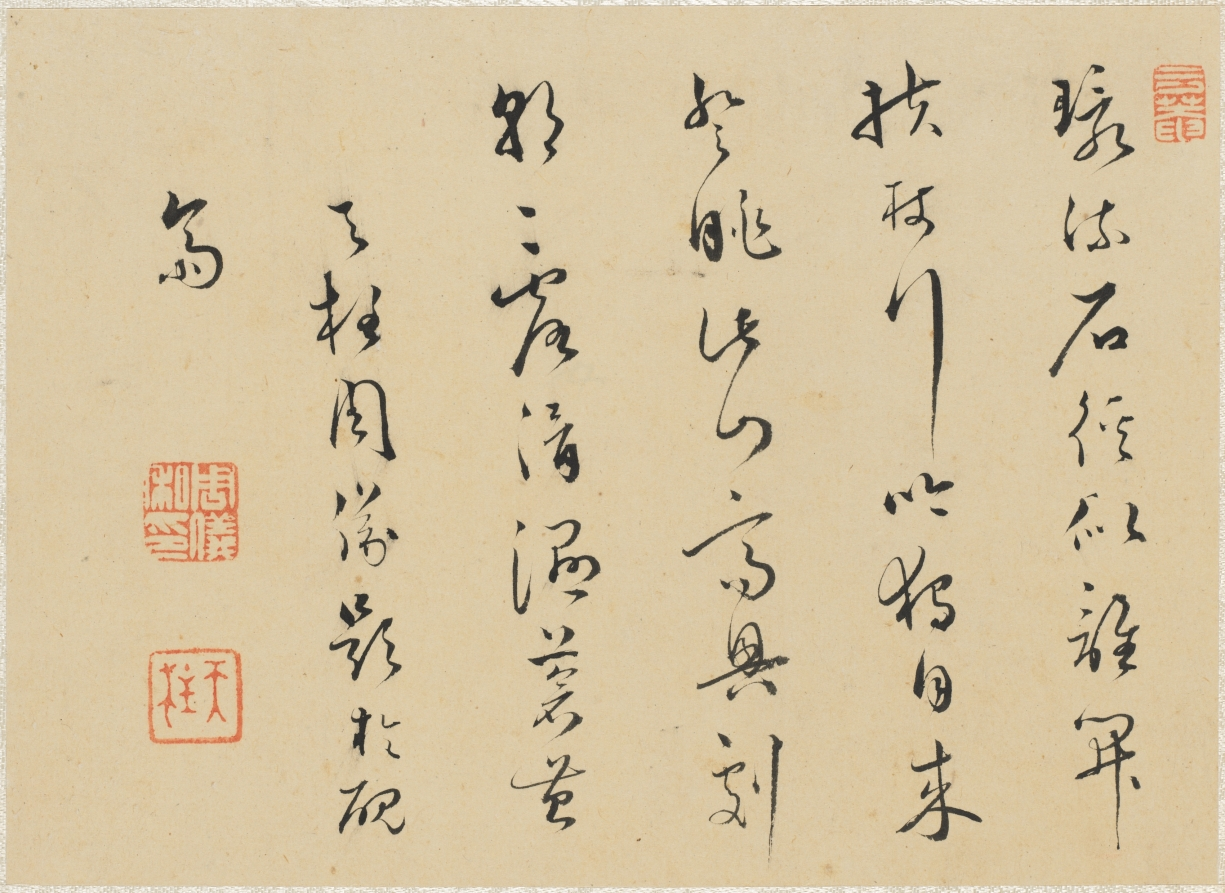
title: Album of Miscellaneous Subjects, Leaf 5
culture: China, Qing dynasty (1644-1911)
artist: Fan Qi (Chinese, 1616–after 1694)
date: early 1650s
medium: album leaf, ink and color on silk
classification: Painting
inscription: Artist seal: Fan Qi 樊圻. Poem by Zhou Yi 周儀 (mid 17th century–about 1705): That stone path surrounded by streams - for whom was it created?/ Leaning on my staff, I walk and hum, arriving alone./ As soon as I ascend to gaze at these mountains, my happiness increases,/ Every morning the moistening dew makes slippery the green moss.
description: Fan Qi's painting on the fifth leaf evokes Zuo Si's poetic line: I shake my robe atop the cliff of thousand ren. The calligraphy by Zhou Yi adjacent to the painting reads: That stone path surrounded by streams—for whom was it created? Leaning on my staff, I walk and hum, arriving alone. As soon as I ascend to gaze at these mountains, my happiness increases, Every morning the moistening dew makes the green moss slippery.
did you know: Barren tree branches on the peak and the bushes' reddish foliage give the scene an autumnal feel.